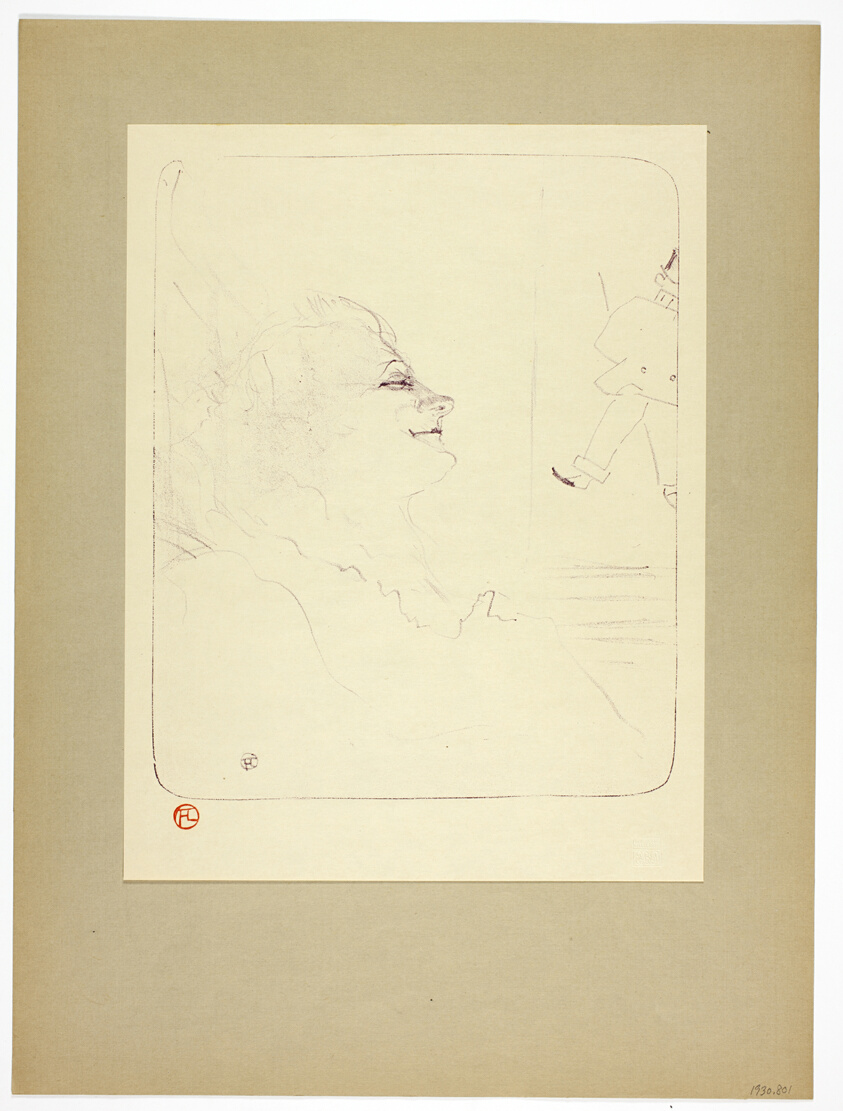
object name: Print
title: Pessima, plate three from Yvette Guilbert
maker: Henri de Toulouse-Lautrec (French, 1864-1901); printed by Westminster Press (English, 20th century); published by the Ernest Brown & Phillips (English, 20th century)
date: 1898, printed 1930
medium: Lithograph (crayon) in purple or violet on cream wove paper hinged at top corners to gray-brown wove paper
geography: France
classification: lithograph; print; prints and drawing